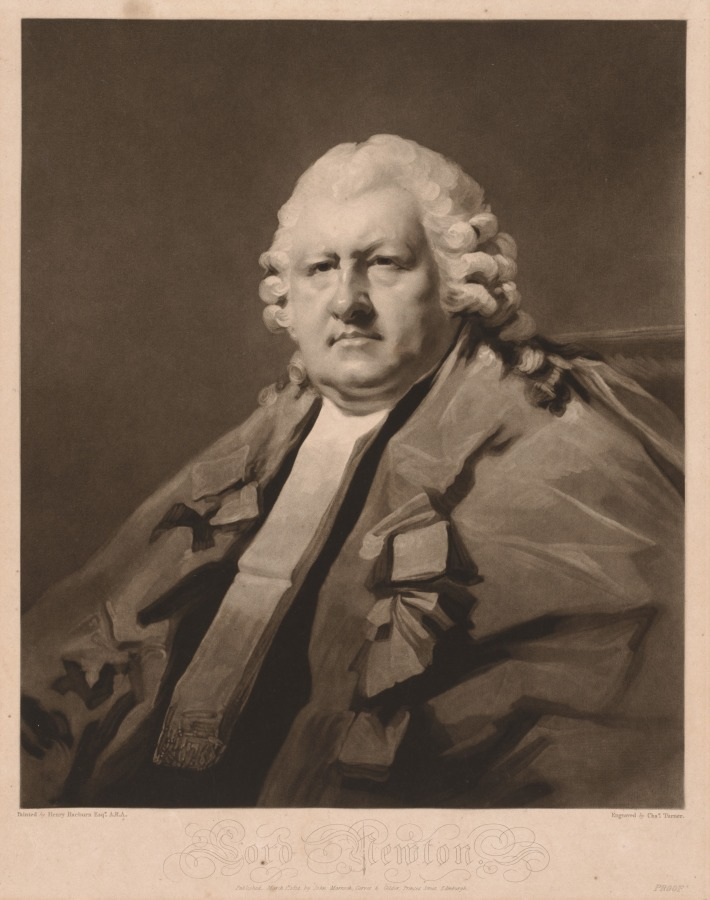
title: Lord Newton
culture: England, 19th century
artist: Charles Turner (British, 1774–1857)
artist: after Henry Raeburn (Scottish, 1756–1823)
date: 1814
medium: mezzotint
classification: Print